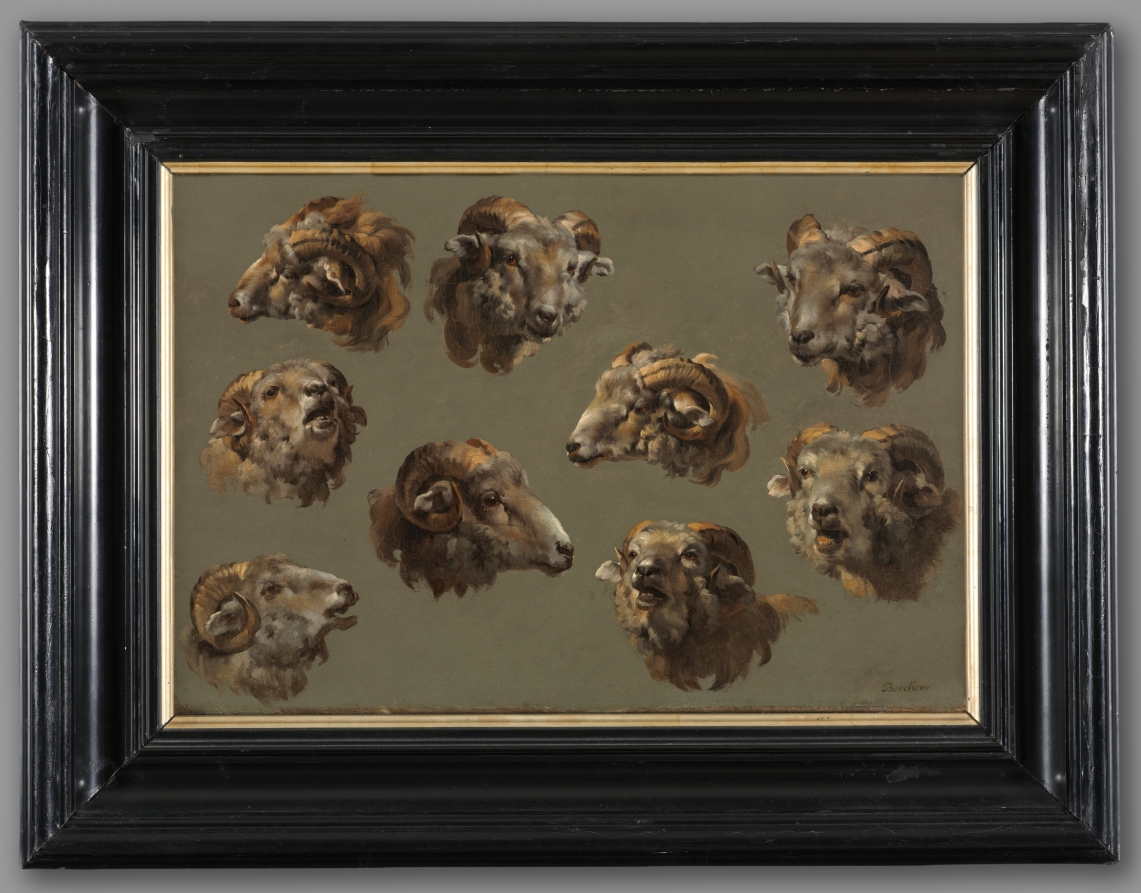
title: Studies of Ram Heads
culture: France, 18th century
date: 1700s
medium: oil on canvas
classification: Painting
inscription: signed lower right: Berchem.